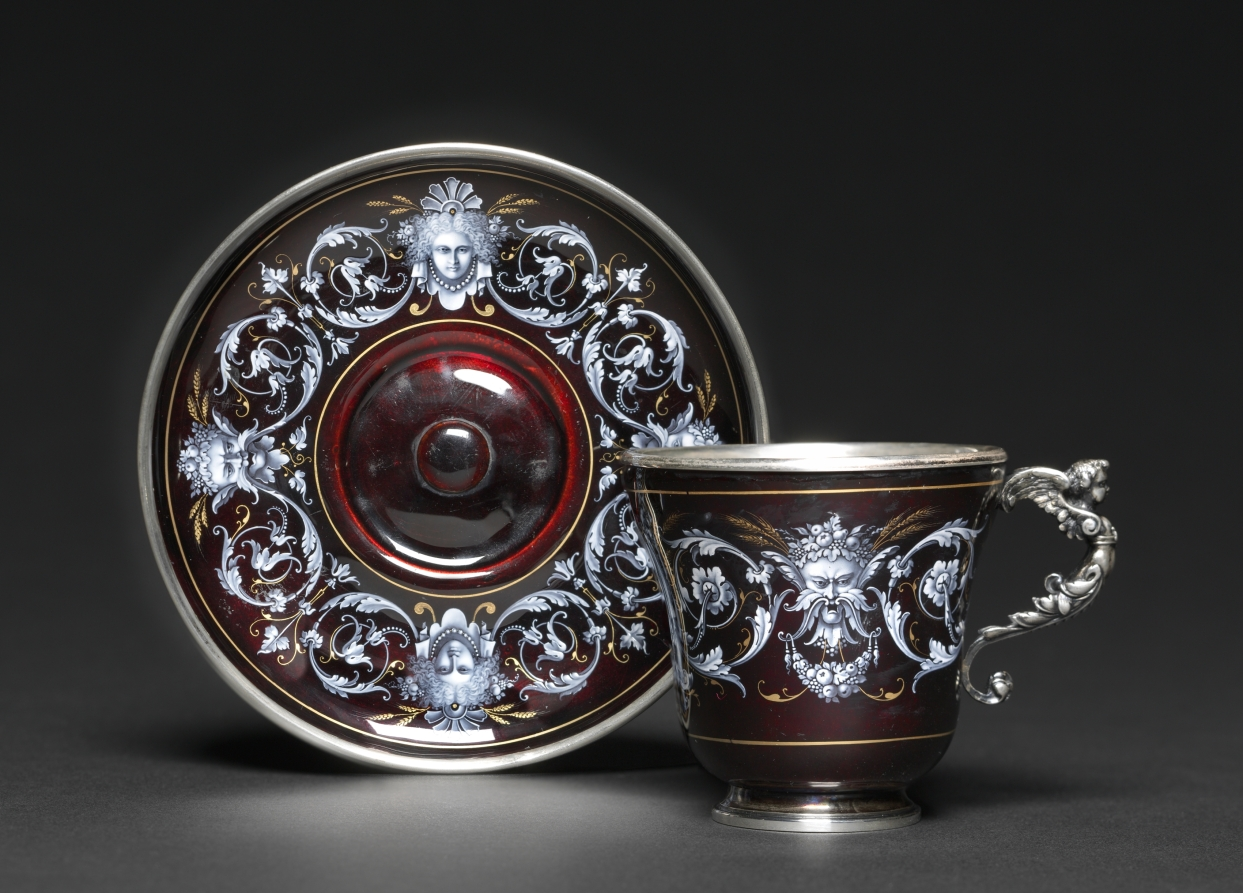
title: Cup and Saucer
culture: France, 19th century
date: c. 1880–1900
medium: silver, enamel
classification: Enamel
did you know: This cup and saucer were made during the Belle Epoque or "Beautiful Era" in France.